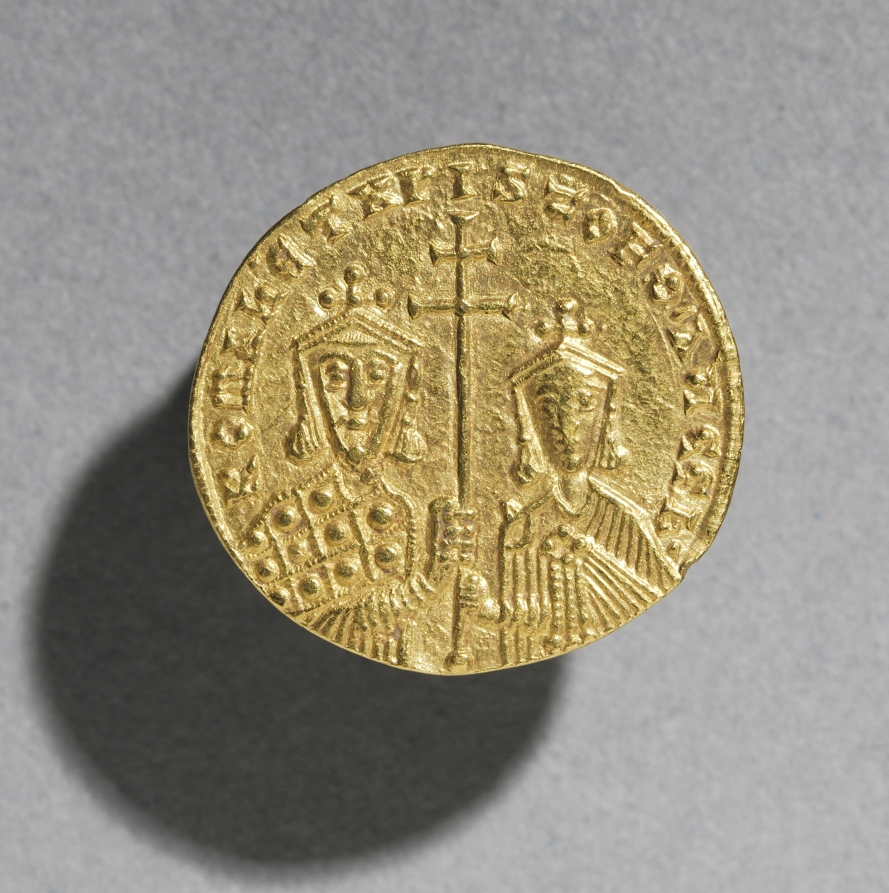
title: Solidus with Romanus I Lecapenus and his Son Christopher (reverse)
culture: Byzantium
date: 920–944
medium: gold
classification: Coins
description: Byzantine Gold Coins The vast number of surviving Byzantine coins attests to the level of trade across the empire. Controlled and supervised by the emperor, the producers of coins took care to represent his authority and reflect his stature. Talented artists were recruited to engrave the dies (molds) used for the striking of coins. Emperors increasingly came to include their heirs and co-emperors on their coinage, as well as other family members or even earlier rulers. Coins were recognized, then as now, as small, portable works of art. With their inscriptions and images, Byzantine coins provide valuable documentation of historical events and a record of the physical appearance of the emperors. The coins shown here include the solidus, the basic gold coin of 24 karats; the tremissis, a gold coin of one-third the weight and value of the solidus; and the nomisma, which in the 10th century replaced the solidus as the standard gold coin.